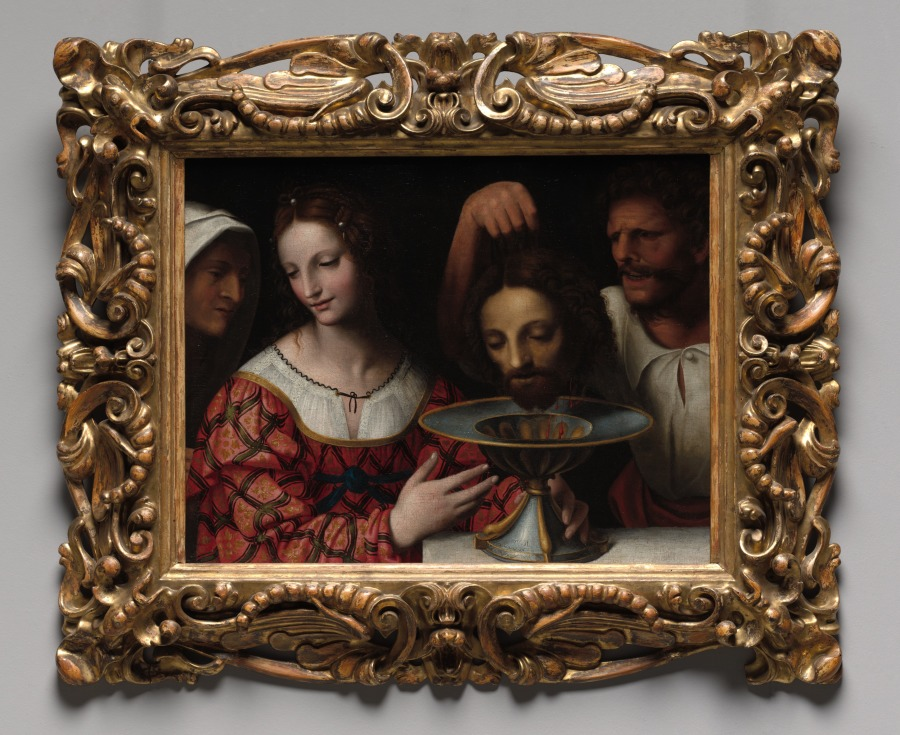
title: Salome with the Head of Saint John the Baptist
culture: Italy, Milan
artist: follower of Bernardino Luini (Italian, c. 1480-c. 1532)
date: 1500s or later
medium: oil on canvas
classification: Painting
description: Salome’s dancing so pleased her stepfather Herod that he offered her anything she wanted. Her mother advised Salome to demand John the Baptist’s head, which Salome presented to her family on an elaborate dish. Despite its biblical source, this work was meant for a domestic setting, whose owner would have admired the elegant presentation of a shocking story.